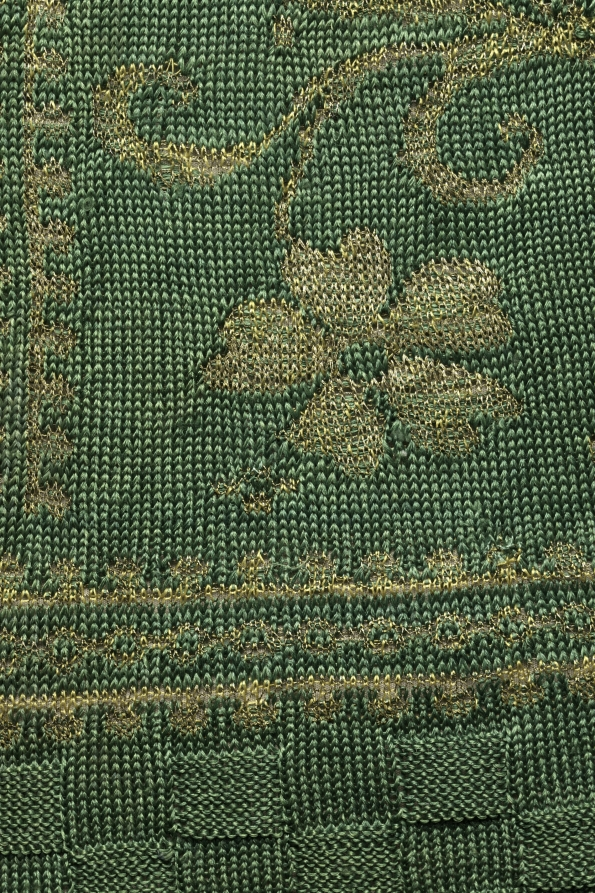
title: Knitted Hunting Jacket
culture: Italy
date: 1600s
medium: knitted silk with gold thread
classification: Garment